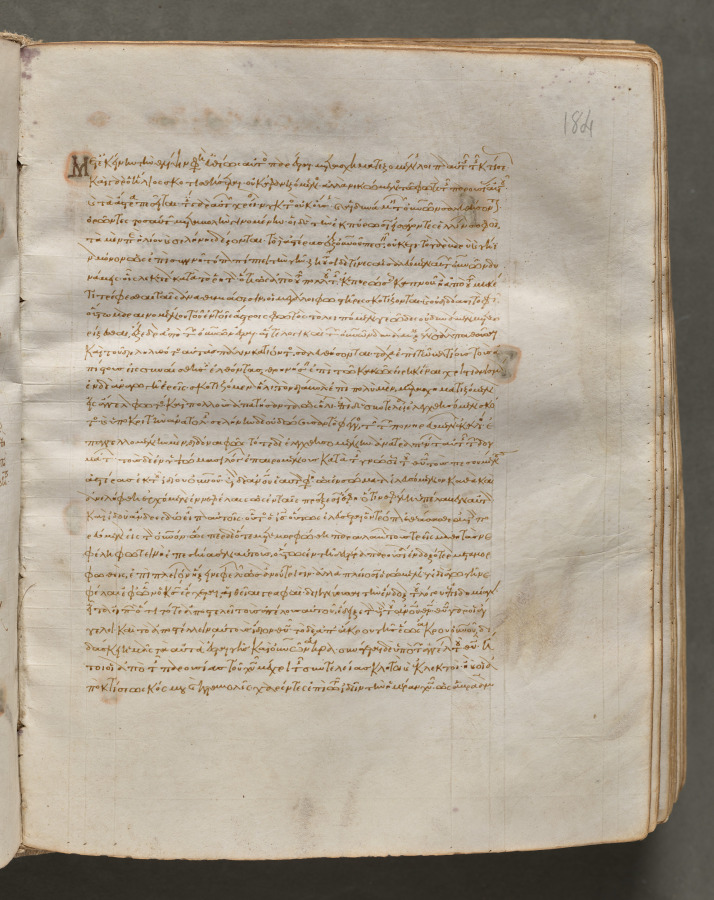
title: Text, folio 184 (recto), from a Gospel Book with Commentaries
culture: Byzantium, Constantinople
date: c. 1000–1100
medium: ink, tempera, and gold on vellum; leather binding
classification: Bound Volume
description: Each of the four gospels in this book opens on a page with brilliantly illuminated borders depicting the author of the text as well as birds-principally peacocks, symbols of the immortality of the soul-and fountains, representing the fountain of life and the salvation of the soul. This volume consists of 428 leaves with texts in Greek. Its level of sophistication suggests that it was probably written and decorated in a monastery in Constantinople.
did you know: Gospel Books were carried in procession through Byzantine churches.